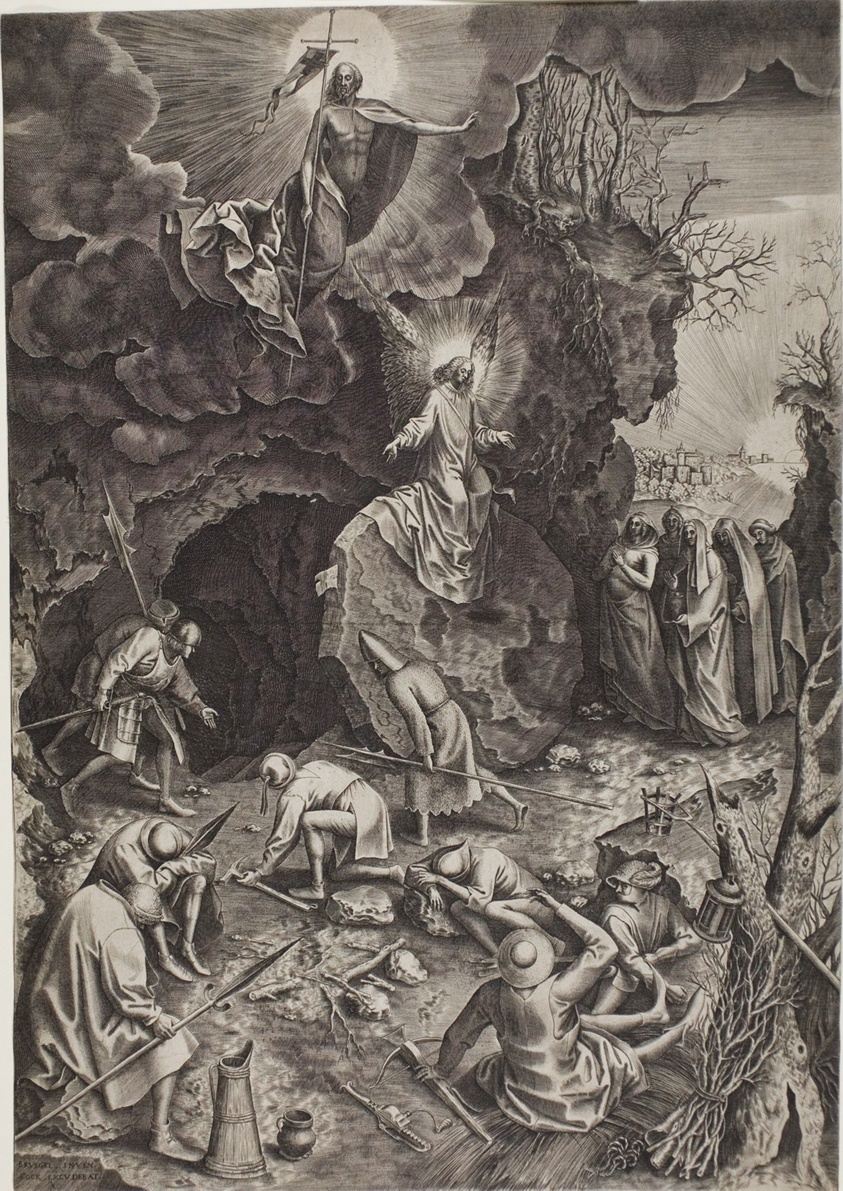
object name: Print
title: The Resurrection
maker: Philip Galle (Flemish, 1537–1612); after Pieter Bruegel, the Elder (Flemish, 1525/30-1569)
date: c. 1580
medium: Engraving in black on ivory laid paper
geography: Netherlands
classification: engraving; print; prints and drawing